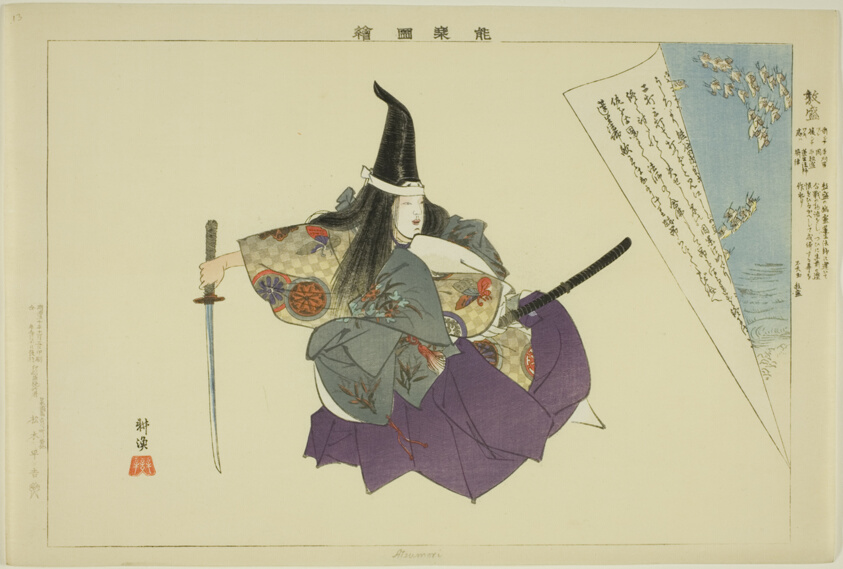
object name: Print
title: Atsumori, from the series "Pictures of No Performances (Nogaku Zue)"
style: Japanese (culture or style)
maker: Tsukioka Kogyo; Japanese, 1869-1927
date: 1898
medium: Color woodblock print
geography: Japan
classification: woodblock print; print; asian art